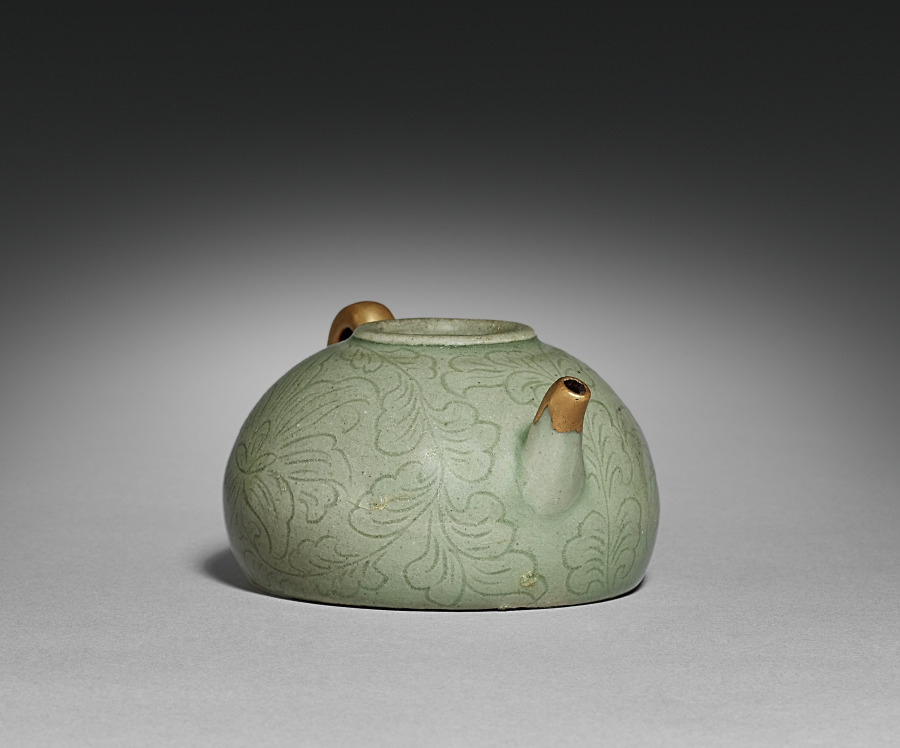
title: Wine Ewer with Incised Scroll Design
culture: Korea, Goryeo dynasty (918–1392)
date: 1100s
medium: celadon with incised and carved design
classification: Ceramic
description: Many celadon ceramics, such as these two miniature pots, have been repaired with gold lacquer. Termed kintsugi (literally meaning “gold joinery”) in Japanese, this restoration method highlights broken parts with glittering gold mixed with lacquer. Initiated in 15th-century Japan, the technique follows a popular aesthetic concept called wabi-sabi, which finds beauty in imperfect things. Goryeo celadons were considered rare treasures among early 20th-century Japanese collectors; thus, their broken condition is brilliantly highlighted in gold lacquer, as seen here in the repaired spouts, handle, and lid.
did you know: Termed kintsugi (literally meaning “gold joinery”) in Japanese, this method of repairing broken parts with glittering gold mixed with lacquer was extensively used for ceramic works in the Goryeo period, such as this one.